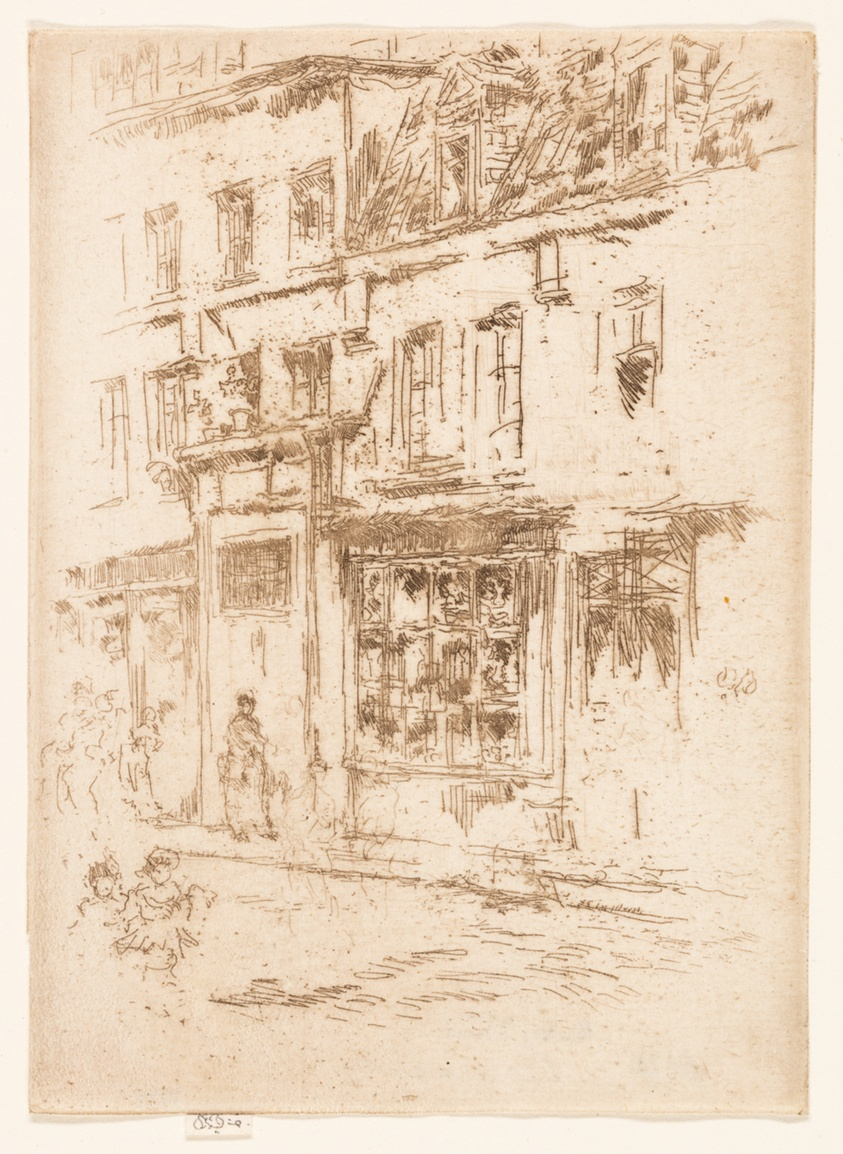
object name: Print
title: Petite Rue au Beurre, Brussels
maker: James McNeill Whistler (American, 1834-1903)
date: 1887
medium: Etching with foul biting in brown ink on ivory laid paper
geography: United States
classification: etching; foul biting; print; prints and drawing; paper